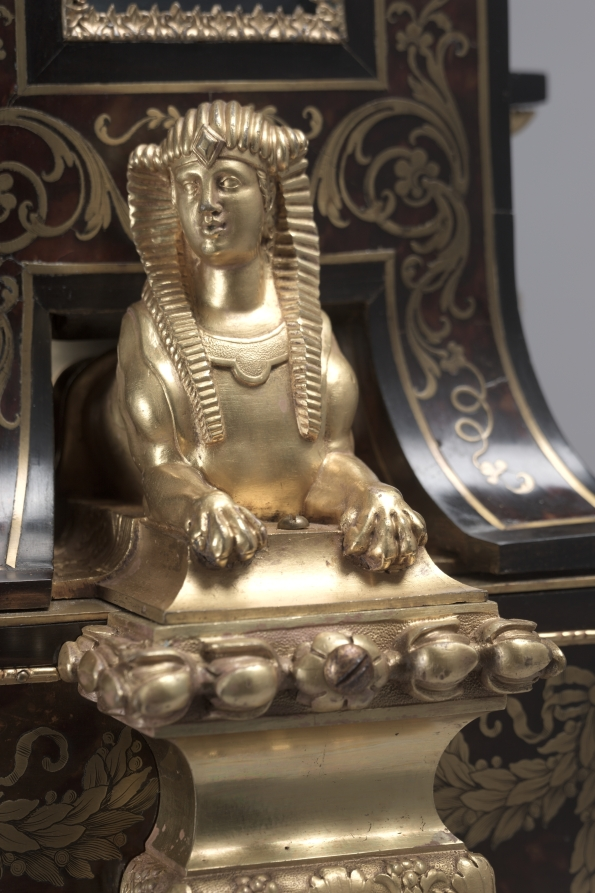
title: Clock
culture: France, late 17th Century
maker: André-Charles Boulle (French, 1642–1732)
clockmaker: Balthazar Martinot II (French, 1636–1714)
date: c. 1695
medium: tortoise shell and brass inlay, gilt bronze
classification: Furniture and woodwork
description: Appointed cabinetmaker to King Louis XIV in 1672, André-Charles Boulle became a master of furniture making in France during the late 1600s until his death in 1732. Known primarily for his use of marquetry, in which metal patterns are inlaid into tortoiseshell then applied within the veneered surface of the furniture, Boulle established a level of quality and craftsmanship few others could achieve. As a result, his work found favor at the royal court and among other aristocrats and diplomats eager to impress the king. Often exhibiting stout architectural proportions with elegant groups of inlaid motifs, Boulle’s designs are an example of the intellectual fashion for contrasting ideas, materials, and motifs. With its relatively new scientific invention of a pendulum mechanism and the addition of a barometer, the mantel clock represented the wealth, prestige, and intellect of its owner.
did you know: The Latin phrase inscribed on this clock, Dirigit atque movet, can be translated as "time constantly moves on."